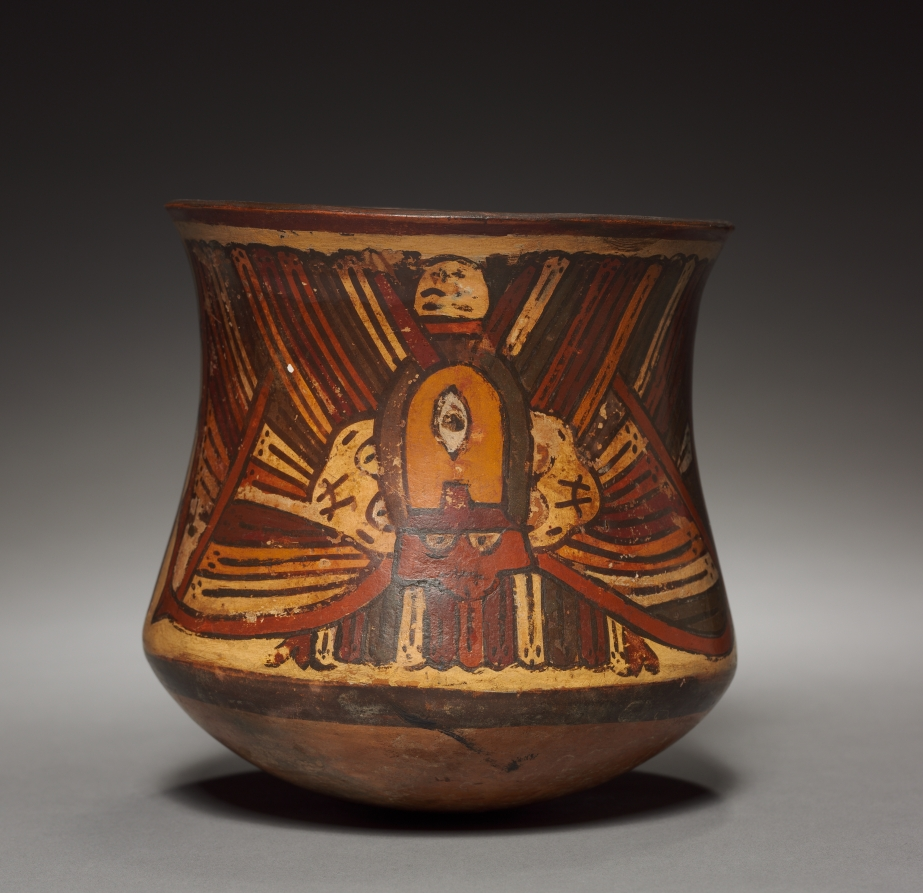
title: Vase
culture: Peru, South Coast, Nasca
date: 2000–20 BCE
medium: pottery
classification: Ceramic